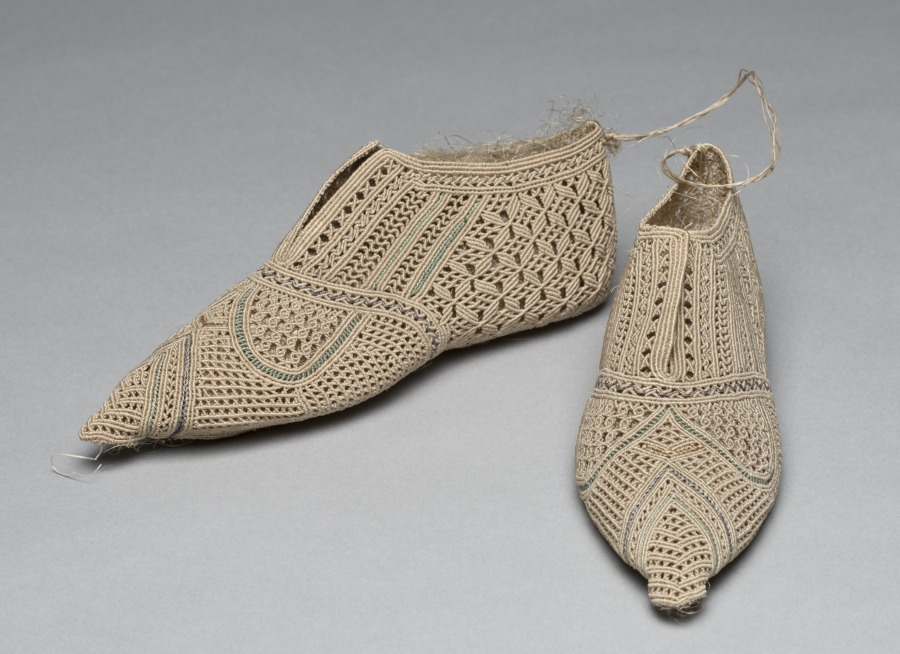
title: Pair of Shoes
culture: Philippines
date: 1850s-1920s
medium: Abacá fiber: macramé knotted lace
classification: Garment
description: Finely knotted abacá fibers form intricate geometric patterns in this small pair of shoes, likely created for display rather than for wear. Some sections are dyed, adding subtle tonal variation to the design. The macramé technique combined with local abacá suggests a colonial-era or early-20th-century hybrid craft, likely taught in a convent or school setting.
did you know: The shoes are unstitched at the bottom, suggesting they were never meant to be worn.